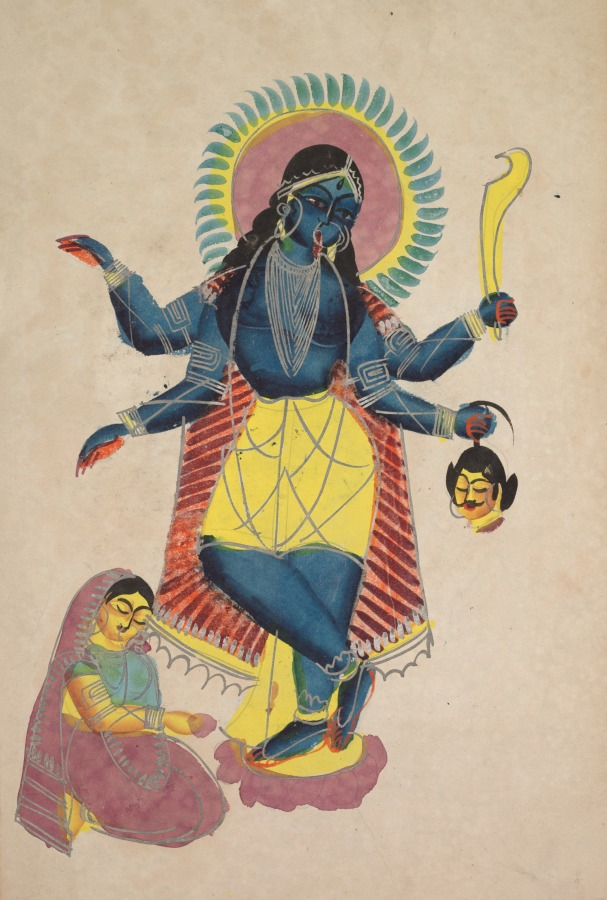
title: Krishna as Kali worshipped by Radha (recto), from a Kalighat album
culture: Eastern India, Bengal, Kolkata, Kalighat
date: c. 1890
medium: Gum tempera, graphite, and ink on paper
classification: Painting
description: Krishna’s cowgirl (gopi) Radha was Ayanaghosha’s wife, and her devotion to him transcended marital ties. Whenever Radha was together with Krishna and her husband appeared, Krishna instantly transformed himself into Kali and Radha into her devotee. Radha, a model devotee, symbolizes the human soul and its longing for god. Her willingness to break the rules of duty (dharma) exemplifies her devotion.